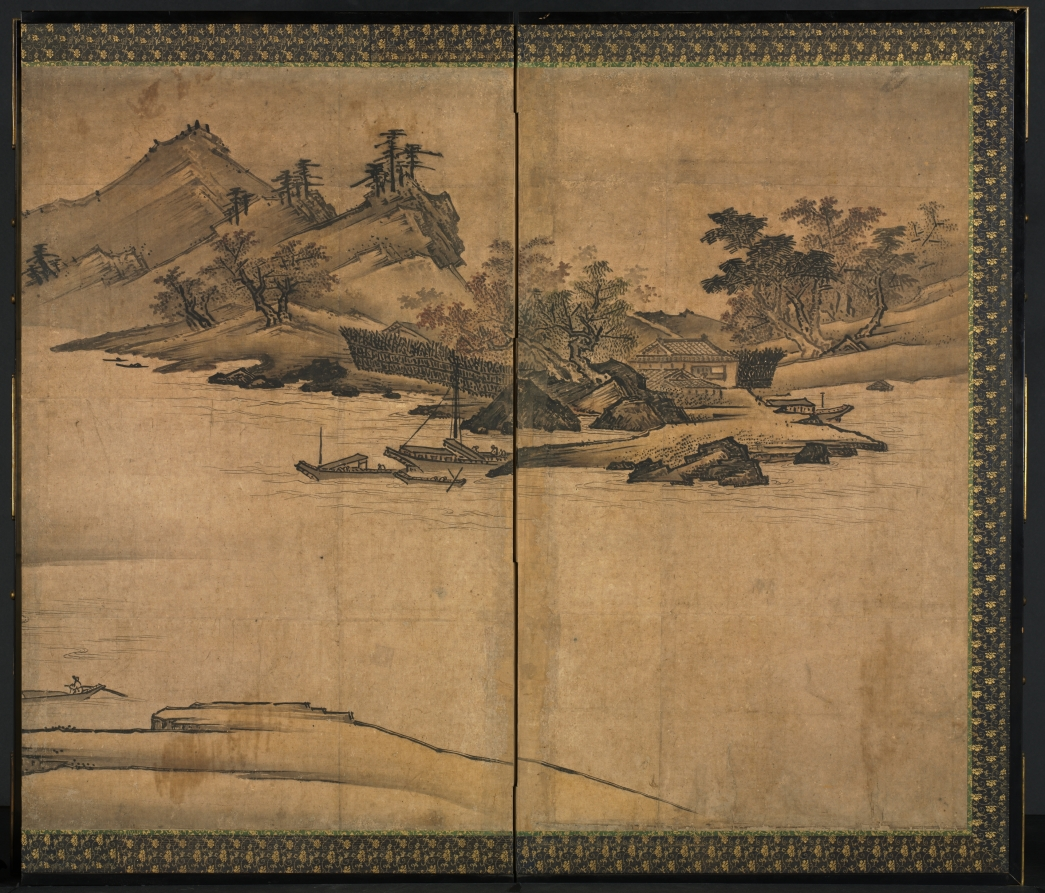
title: Landscape of the Four Seasons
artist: Yi Sumun (Korean, b. c. 1404)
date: late 1400s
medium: One of a pair of six-panel screens; ink and slight color on paper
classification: Painting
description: Yi Sumun is believed to have been a Korean painter who migrated to Japan in 1424 at the age of 20. This pair of screens is the artist’s most important composition in this format. Viewed from right to left, the screens show the passage of the four seasons, a popular theme in medieval Japanese ink painting.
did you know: Yi Sumun is believed to have been a Korean man who moved to Japan at the age of 20 and became an influential landscape painter in Japan.